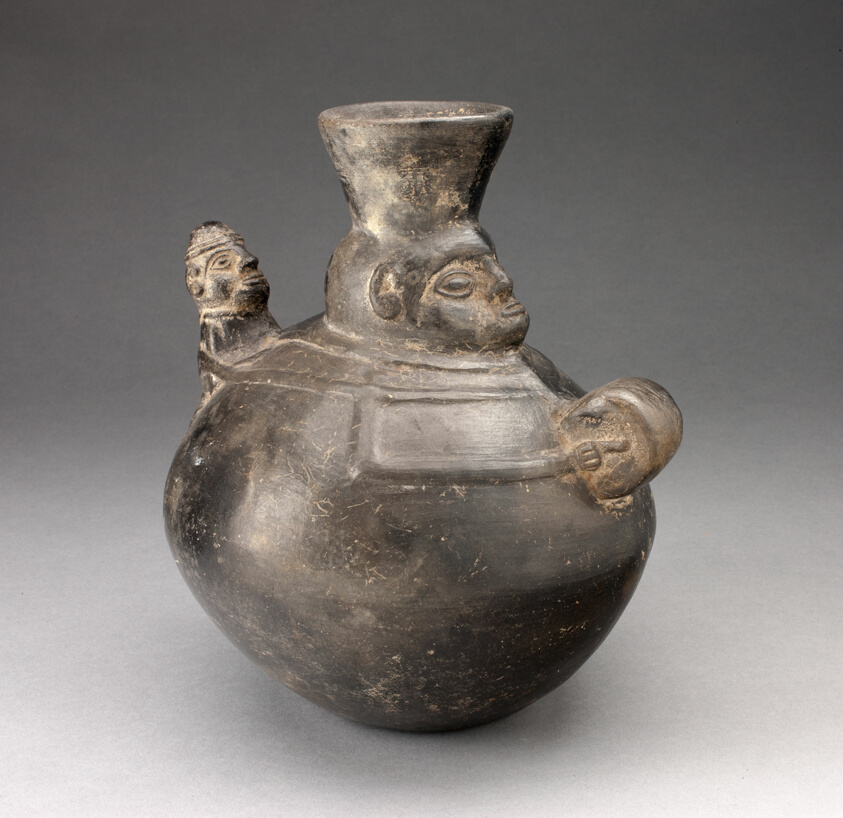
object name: Vessel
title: Jar in the Form of a Figure Holding a Drum and Carrying a Child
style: chimú, Arts of the Americas, andean, andes, south american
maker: Possibly Chimú-Inca; North coast, Peru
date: 1200–1450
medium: Ceramic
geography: Peruvian North Coast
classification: blackware (black basaltes); earthenware; ceramics; vessel; art of the americas